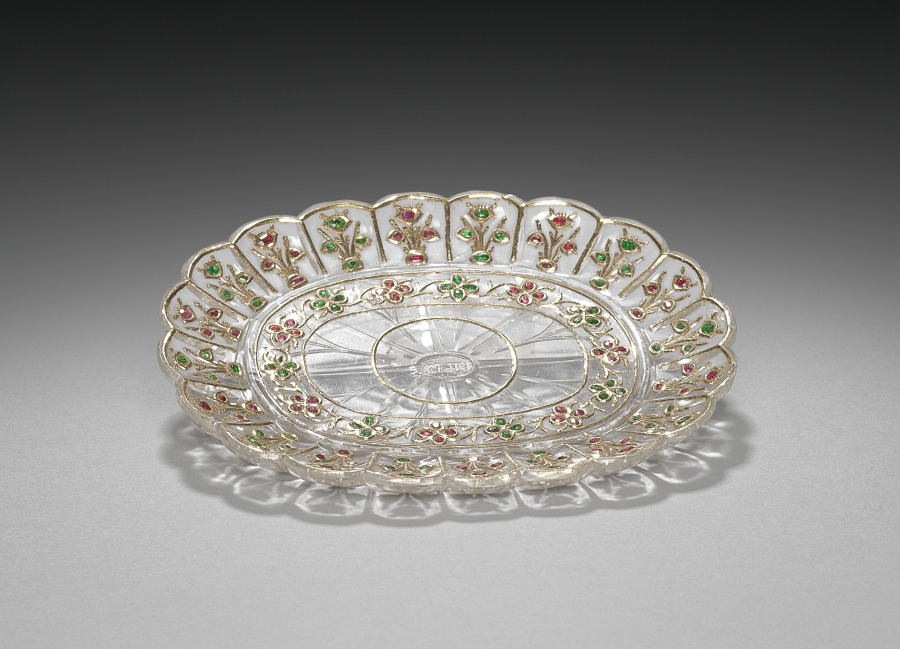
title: Saucer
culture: India, Jeypore, Moghul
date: 18th Century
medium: crystal set with gold and jewels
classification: Jewelry